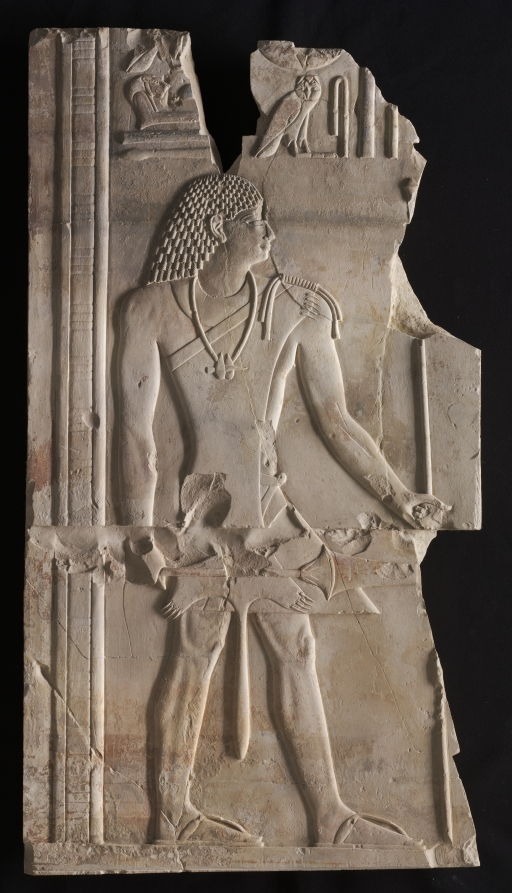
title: Mentuemhat as Priest with Staff and Scepter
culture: Egypt, Late period (715–332 BCE), Dynasties 25–26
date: c. 667–647 BCE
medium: limestone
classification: Sculpture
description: Mentuemhet in his robes as a priest of Amen and carrying the wand used to consecrate food offerings to the god. Raised relief in the style of his time, but showing some influence of Middle Kingdom work.